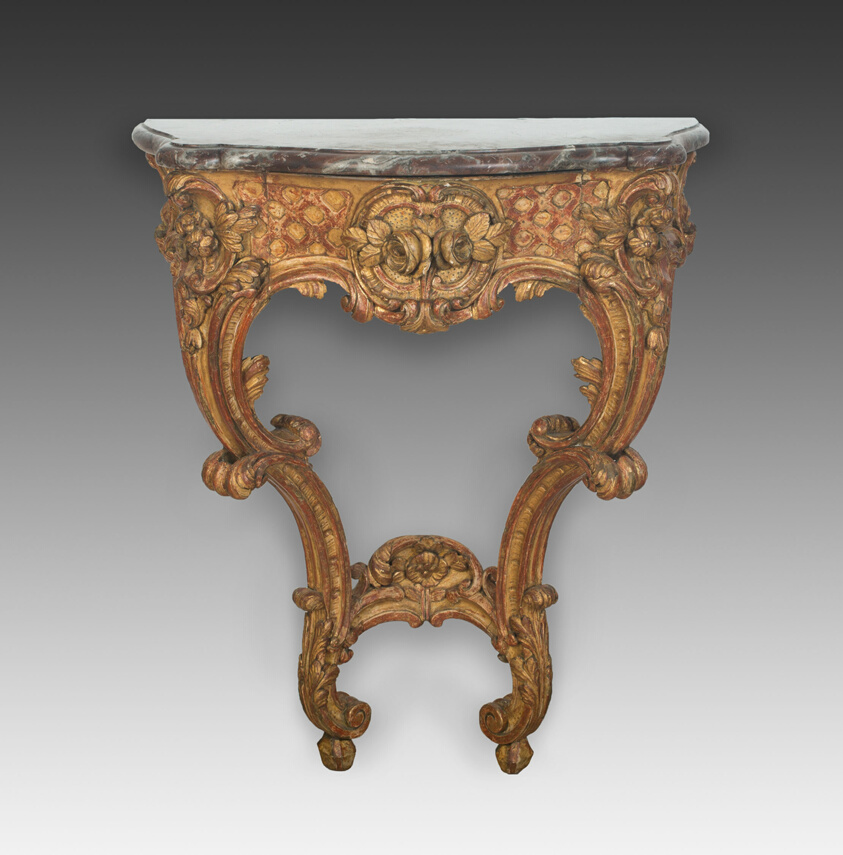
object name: Furniture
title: Console Table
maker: France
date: c. 1730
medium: Carved and gilded wood; marble top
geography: France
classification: table; furniture; european decorative arts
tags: furniture